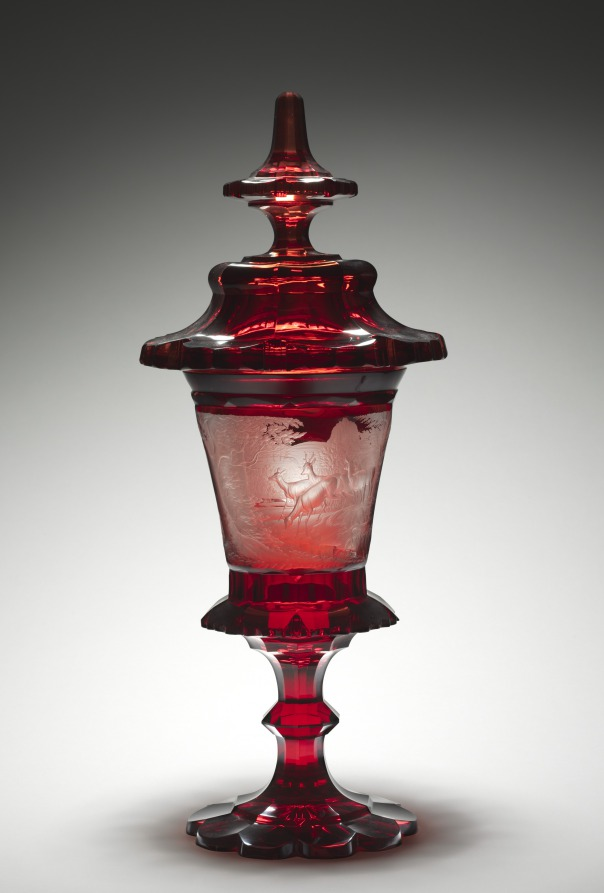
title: Covered Cup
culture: Bohemia, 19th century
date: mid-1800s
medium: ruby glass with engraved decoration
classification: Glass